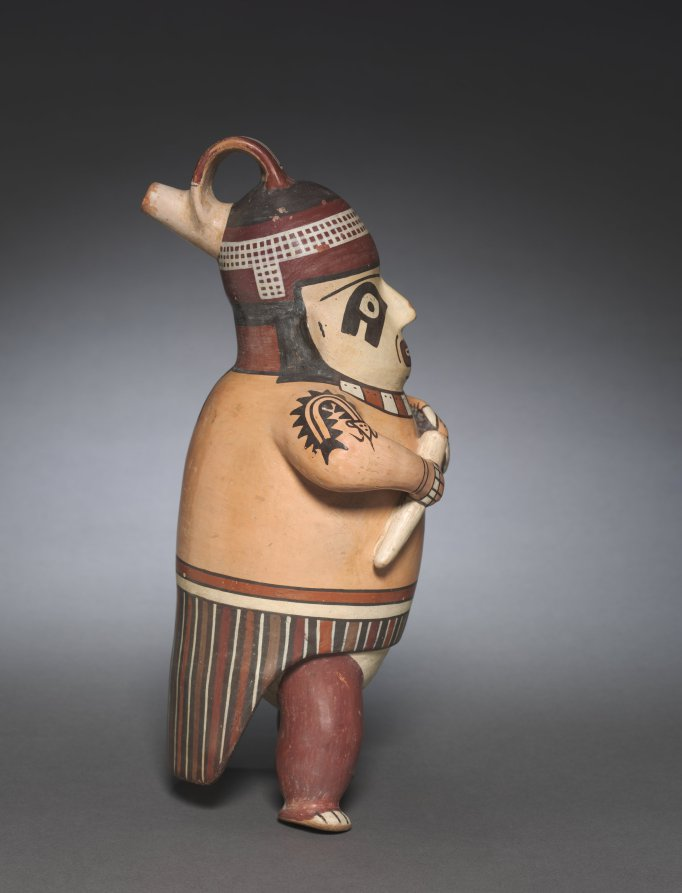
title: Male Effigy Vessel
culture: Peru, South Coast, Nasca, Early Intermediate Period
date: 100–650 CE (thermoluminescence date, 410–1010 CE)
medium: ceramic and slip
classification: Ceramic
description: The style is typically Nasca: modeling is minimal and the surface is decorated with the vibrant, earth-colored slips that are a hallmark of Nasca ceramic art. Male figures are a well-known category of Nasca ceramic production, although the shape of this one, which stands upright on two legs and is additionally supported from behind by a long loincloth, is unusual.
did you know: This figure holds a human head, which the Nasca viewed as a source of great power.